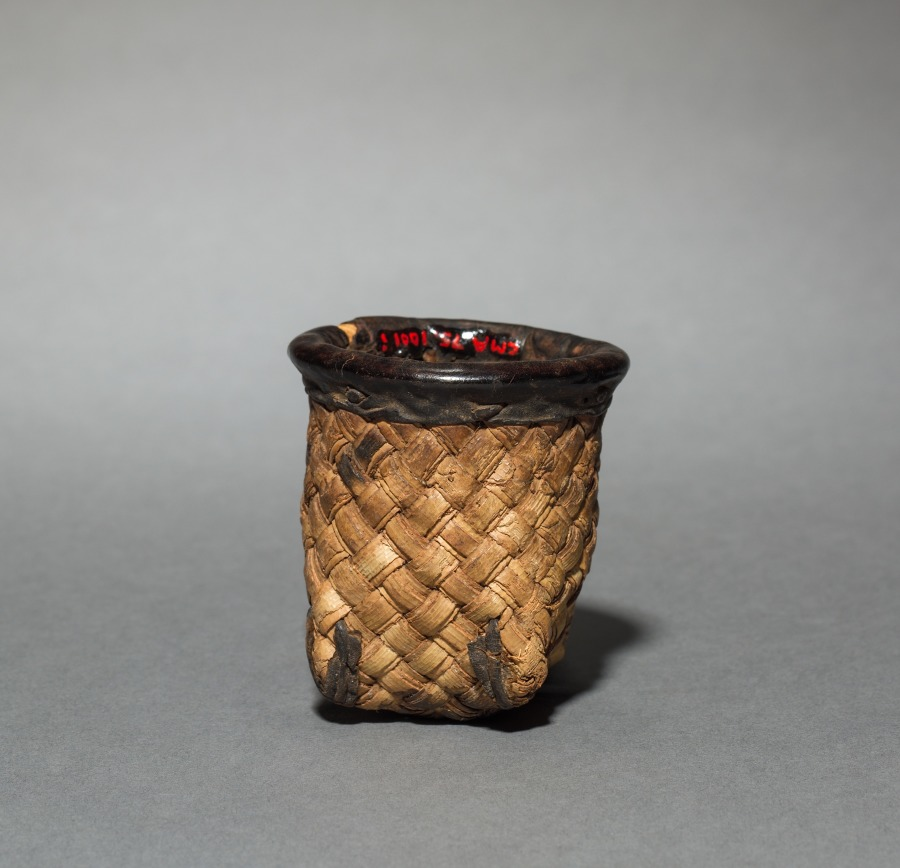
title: One of Ten Nesting Wedding Baskets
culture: Africa, Western Africa, Burkina Faso, Lobi–style maker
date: c 1900s?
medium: Plant fiber and leather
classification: Vessels